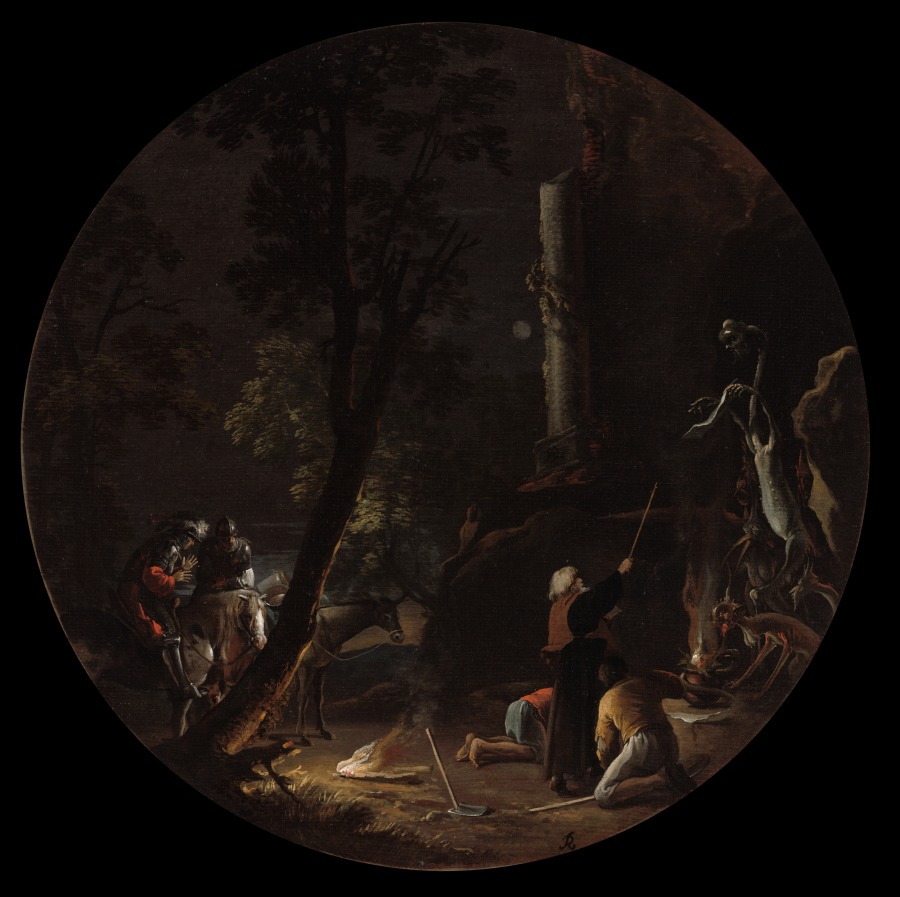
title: Scenes of Witchcraft: Night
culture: Italy, 17th century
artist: Salvator Rosa (Italian, 1615–1673)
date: c. 1645–1649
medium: oil on canvas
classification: Painting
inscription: Signed: "SR [monogram]"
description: In the pitch black of night, two groups of men are gathered in a forest. To the left, travelers apprehensively pause to watch a magician conjure terrifying apparitions. Since the Middle Ages, necromancy, the act of communing with the dead, was associated with male sorcerers. In Rosa's painting, the wizened necromancer who stands tall and resolute directly below a classical column is reminiscent of Moses, a predecessor to Renaissance depictions of sorcerers. Rosa's learned magicians not only invoke associations with philosophers and intellects, but they would have also referred to the artist himself and the intellectual elite with whom he associated in Florence. Just as a powerful magician could conjure strange creatures with his wand, so too could Rosa shape a strange world with his originality, intelligence, and the skillful use of paint and brush.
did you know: The artist chose the painting's shape to reference the foundational role of the circle in practicing magic.